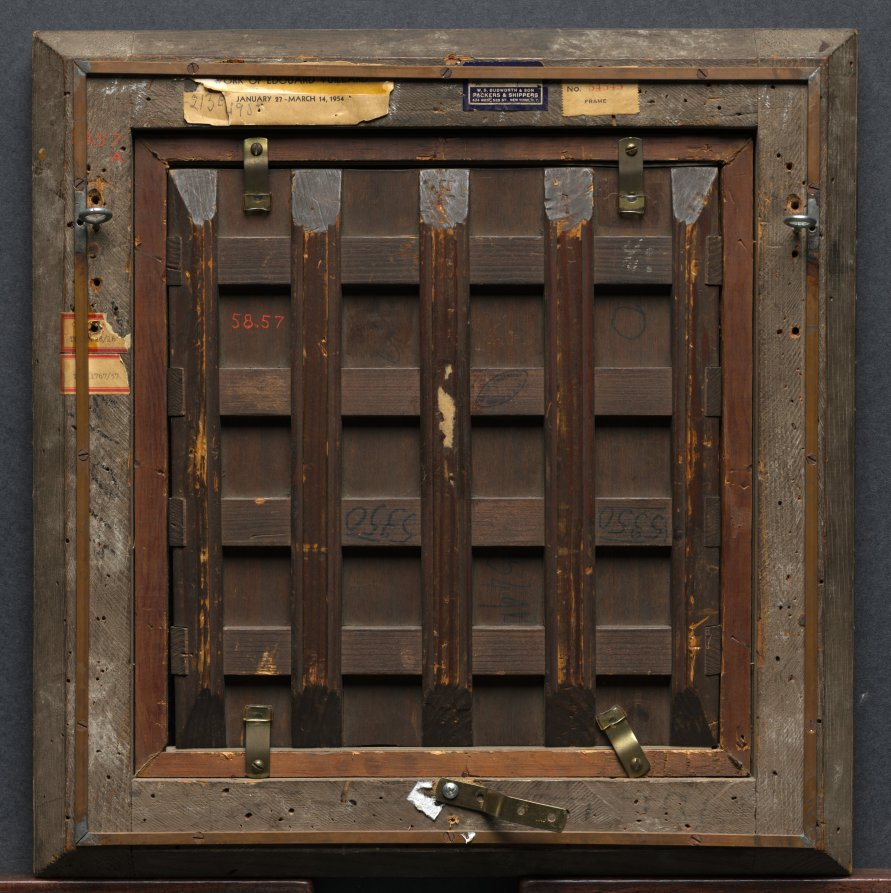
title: At the Café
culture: France, 19th century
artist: Édouard Vuillard (French, 1868–1940)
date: c. 1897–99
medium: oil on board, laid on cradled panel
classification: Painting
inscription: Signed lower left: E Vuillard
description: This scene of two women in a Parisian café has a hushed atmosphere that is heightened by the warm palette and glow of gaslight. Édouard Vuillard and Félix Vallotton were close friends and painted together in the 1890s, but Vuillard’s quiet café and Vallotton’s riotous Bistro (2020.114) could not be more different in mood.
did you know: Vuillard once said, “I don’t do portraits. I paint people in their surroundings.”